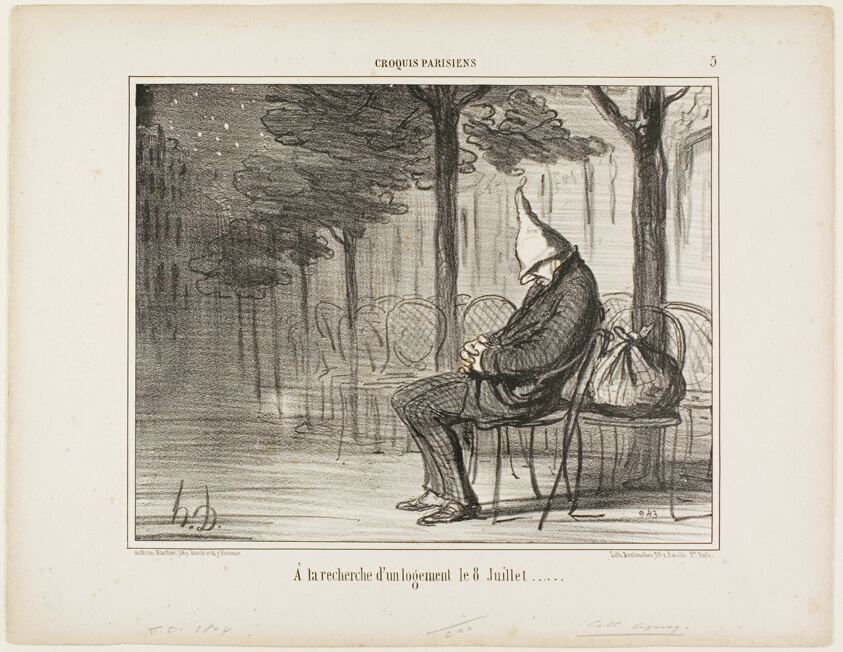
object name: Print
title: Looking for an Overnight Accommodation on the Eighth of July, plate 5 from Croquis Parisiens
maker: Honoré Victorin Daumier; French, 1808-1879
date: 1856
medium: Lithograph in black on ivory wove paper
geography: France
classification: lithograph; print; prints and drawing